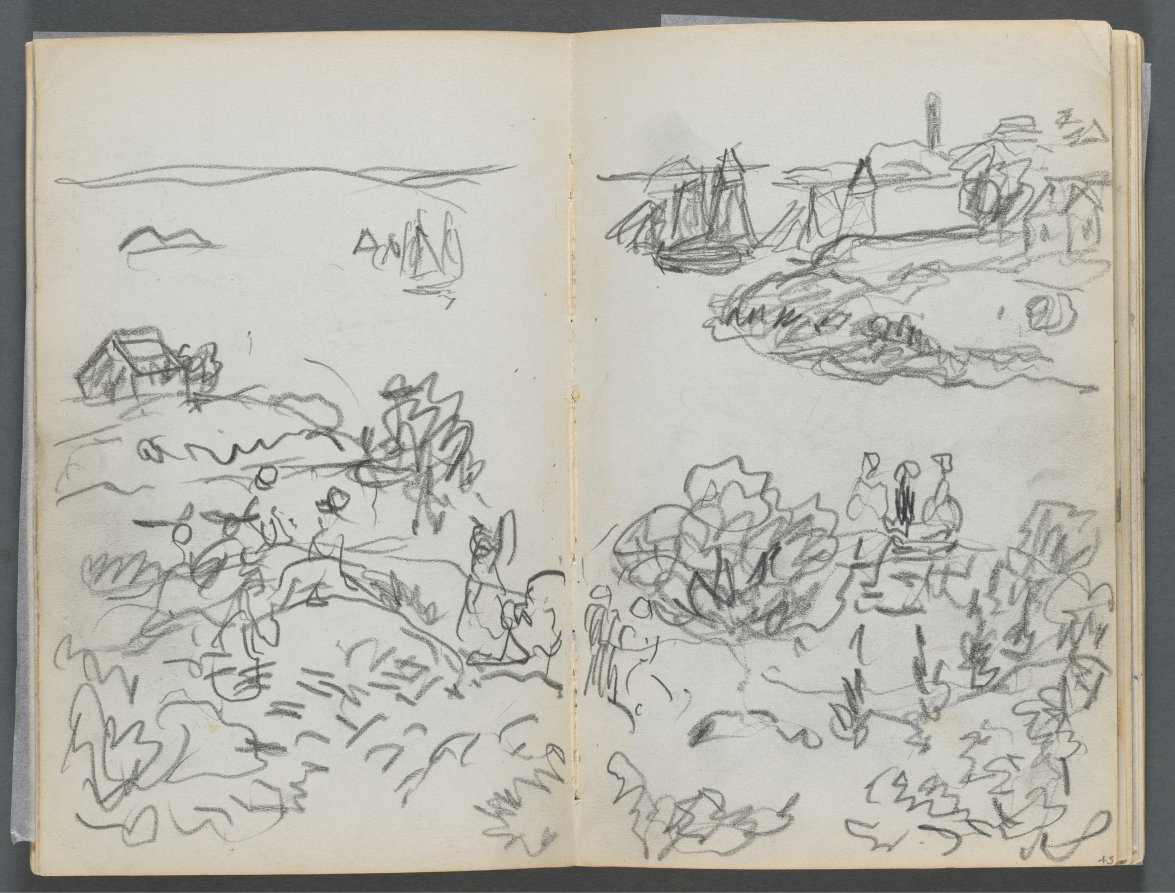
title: Sketchbook, The Dells, N° 127, page 042 & 43: Cove with Boats and Figures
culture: America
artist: Maurice Prendergast (American, born Newfoundland [now Canada], 1858–1924)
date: c. 1919–1921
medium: graphite and watercolor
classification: Bound Volume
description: This sketchbook contains 59 pages of graphite drawings and 16 watercolors made at various locations on Cape Ann, Massachusetts.